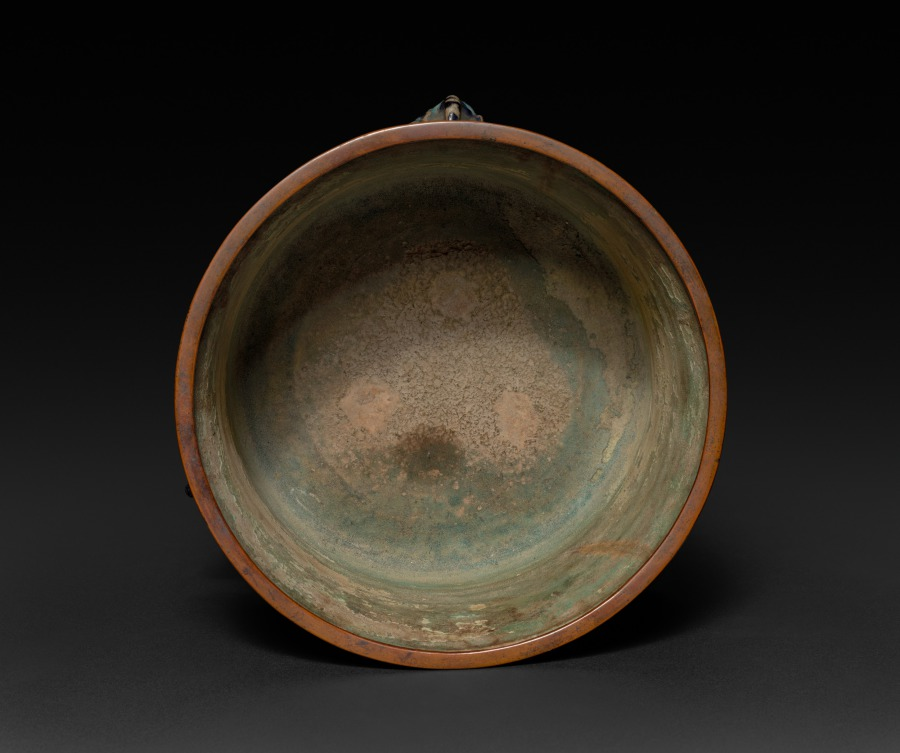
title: Small Jardiniere with Three Legs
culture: China, Jiangxi Province, Ming dynasty (1368–1644)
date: 1368–1644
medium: porcelain, Fahua ware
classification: Ceramic